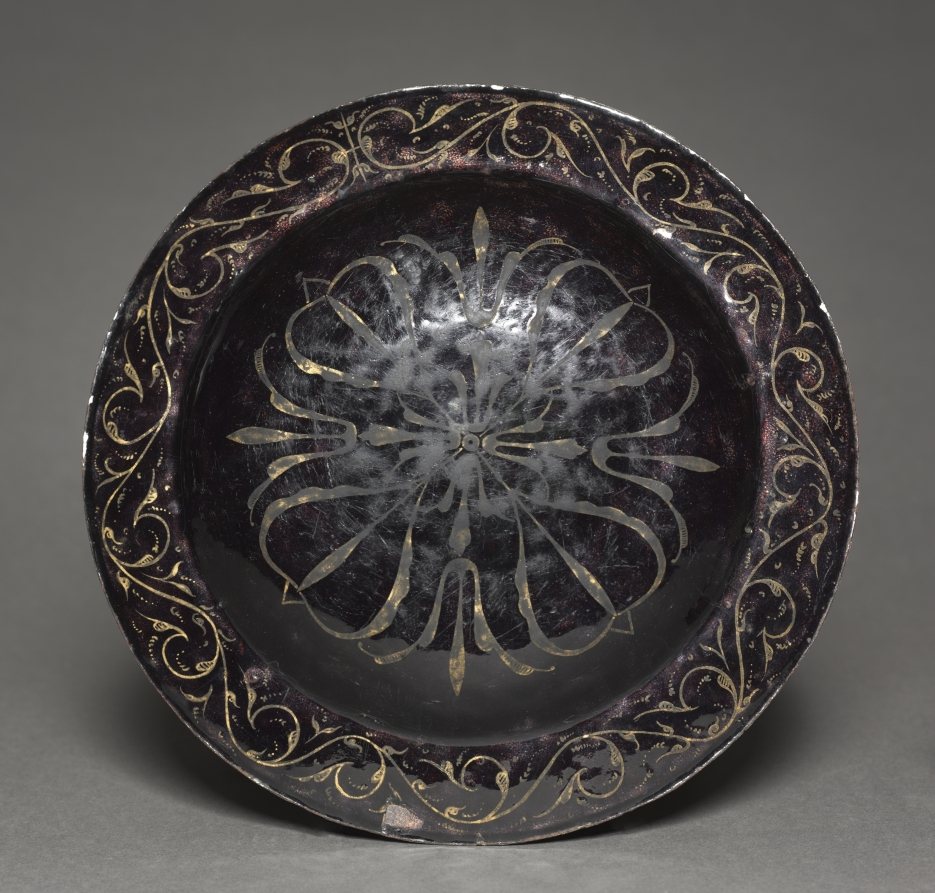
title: Plate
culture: France, Limoges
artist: Jean Limousin (French, 1528–c. 1610)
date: 1500s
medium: painted enamel on copper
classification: Enamel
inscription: signed at left under tree roots: i. L.; written at top center: IVLIVS